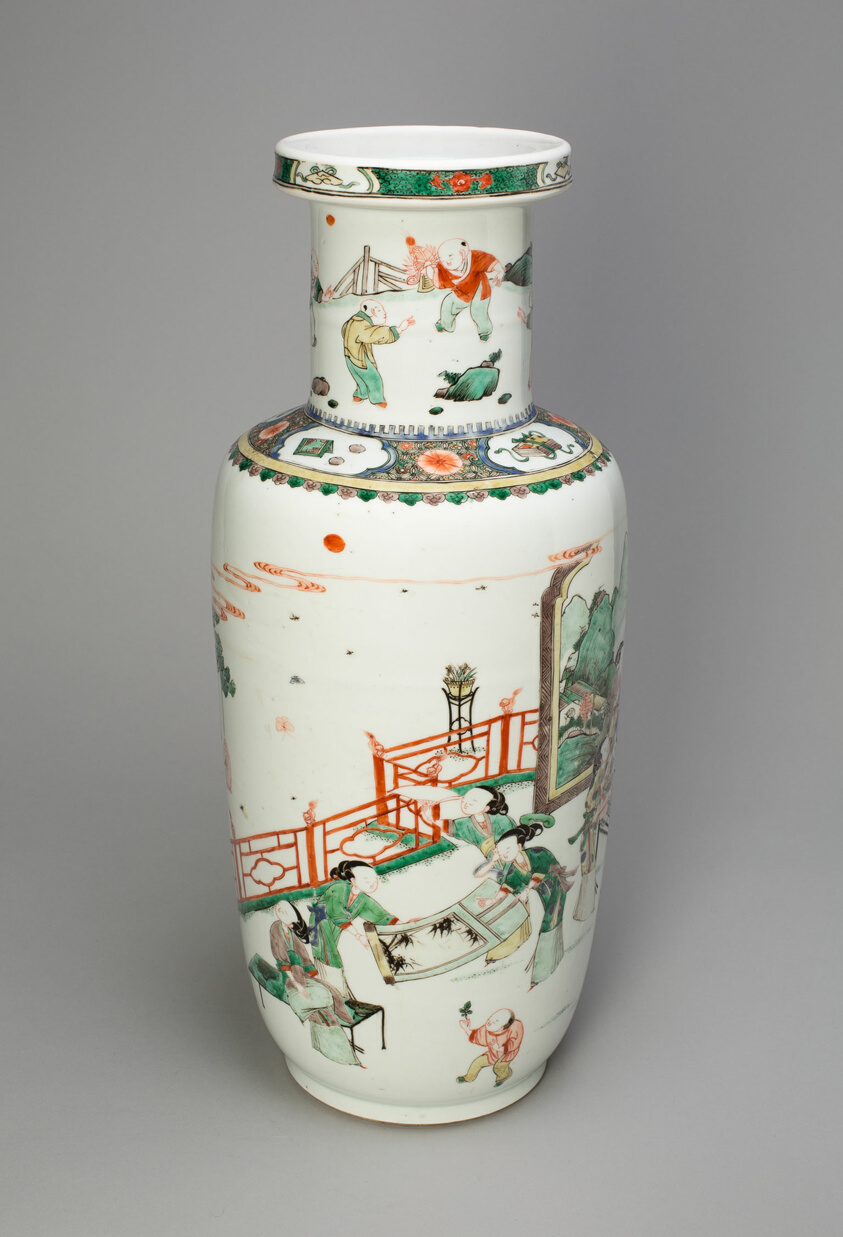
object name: Vessel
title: Baluster Vase with Women Performing the "Four Accomplishments" and Children in a Garden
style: Chinese (culture or style)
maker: China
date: Qing dynasty (1644–1911), Kangxi period (1662–1722)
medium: Porcelain with overglaze enamel decoration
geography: China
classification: vase; vessel; porcelain; ceramics; asian art